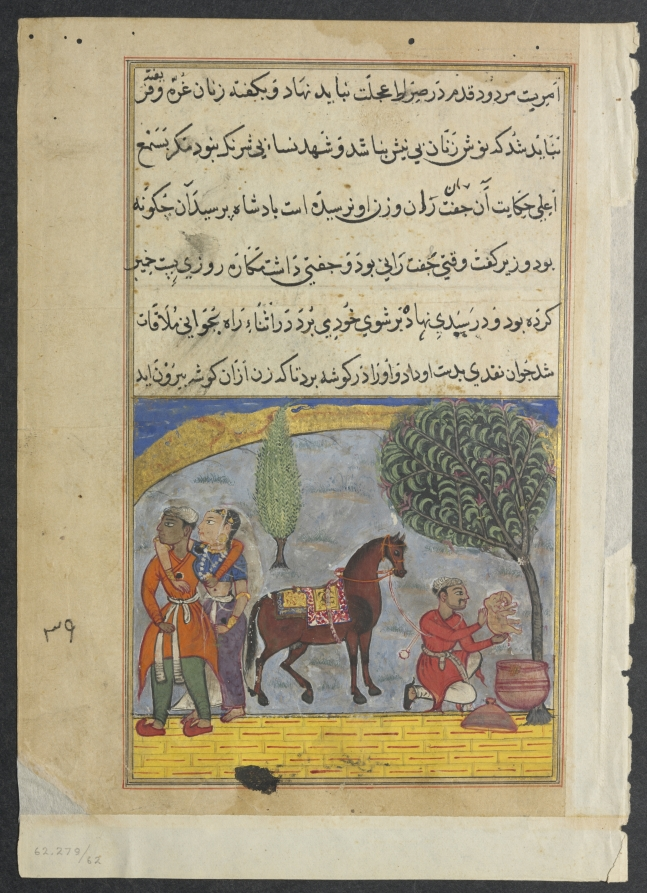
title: The lover’s son makes an elephant of the pastry dough carried by the unfaithful wife and puts it in her basket, from a Tuti-nama (Tales of a Parrot): Eighth Night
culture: Mughal India, court of Akbar (reigned 1556–1605)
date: c. 1560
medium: gum tempera, ink, and gold on paper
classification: Painting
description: On her way to bring a meal to her husband, a woman encountered a man who offered her money for sex. They embrace and go off to a sheltered place, leaving his son with the food basket. Bored with waiting for them, he fashions a pastry from the woman’s basket into the shape of an elephant.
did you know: The mango tree at the right is native to India.